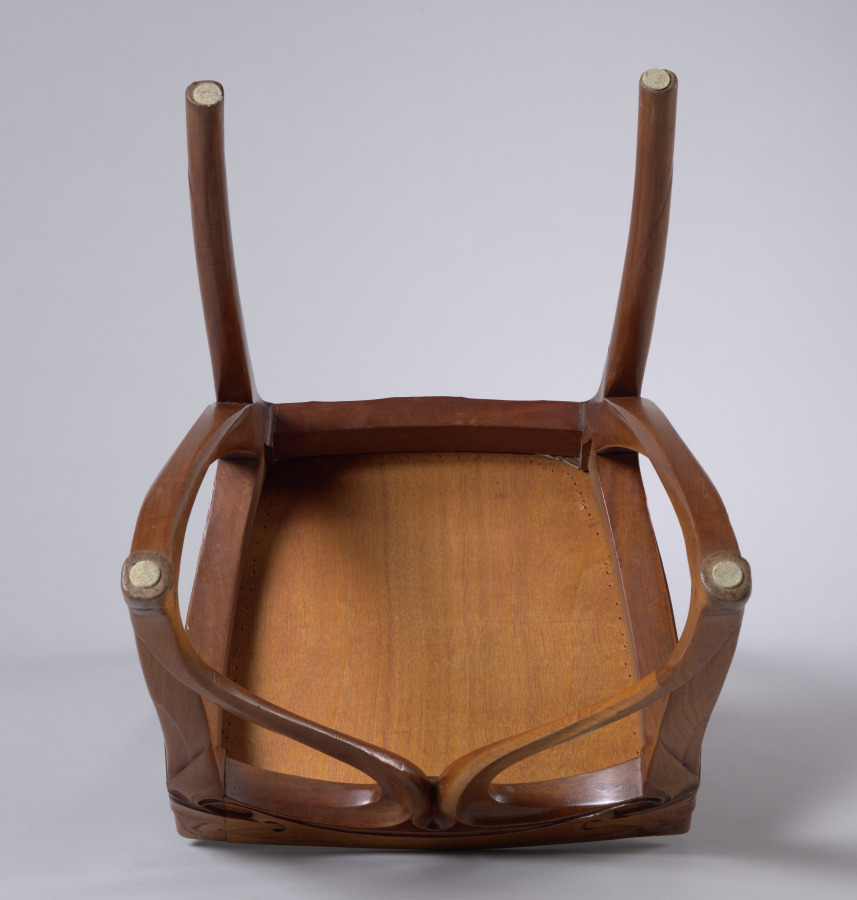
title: Side Chair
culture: France, Paris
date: c. 1900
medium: mahogany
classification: Furniture and woodwork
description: During the 1890s a new style emerged that reflected naturalistic and symbolic motifs found in Japanese and other Asian design. This movement rejected the historicism that had dominated architecture and design during the previous decades and took hold across Europe and America too. In France the style was known as "Art Nouveau," after the name of the gallery belonging to its chief proponent Siegfried Bing, the Maison de L'Art Nouveau (House of the New Art). This side chair typifies Art Nouveau style with its curving lines that seamlessly flow from one to another. This abstract use of curvilinear lines to create form and decoration was one of the major motifs favored by art nouveau designers to evoke naturalistic or organic design. Art Nouveau reached its apex at the 1900 world's fair in Paris, which was intended to herald the new century with a new style of art. However, critics and consumers alike soon rejected Art Nouveau as too sentimental in favor of newer motifs and styles as the moment passed. By 1905 it was all but forgotten.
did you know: This chair may have been designed by Parisian cabinetmaker Eugène Gaillard, who created a very similar design for the pavilion of Siegfried Bing at the 1900 world's fair in Paris.